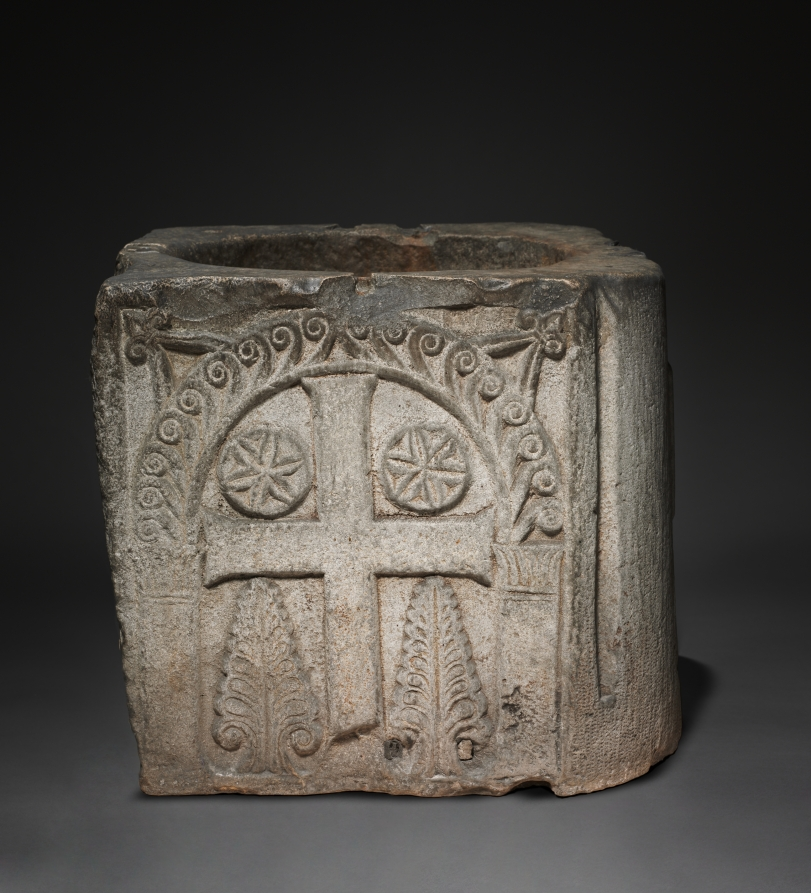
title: Well Head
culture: Lombardic, Italy, Venice(?), Migration period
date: 700s-800s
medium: limestone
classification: Sculpture